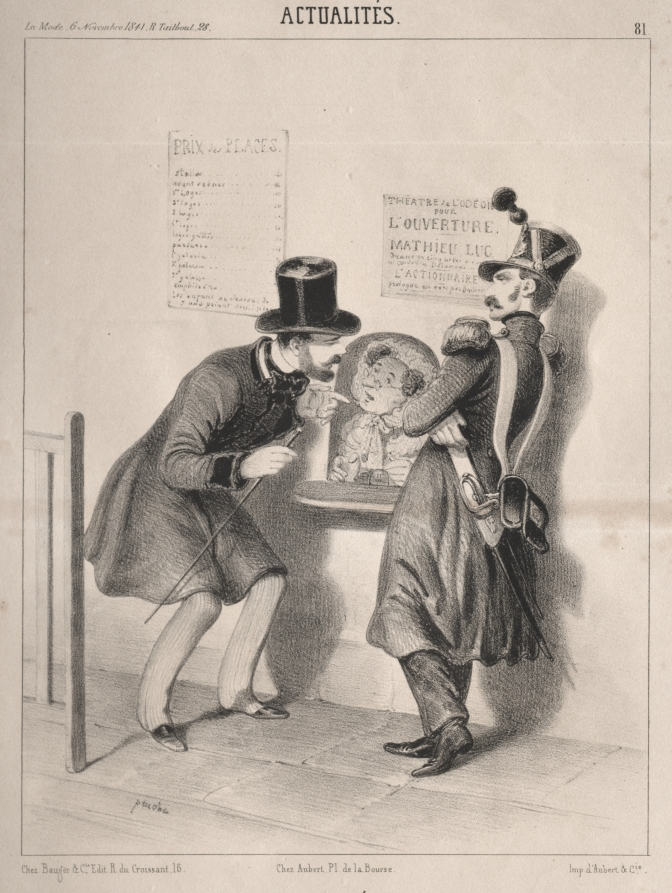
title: Actualités: L'Ouverture du second théatre français. Mr. tout est plein vous ne trouveriez pas même un place au paradis! si vous voulez revenir dans un quinzaine, peut-être que nous en aurons!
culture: France, 19th century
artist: Clémente Pruche (French, 1831–1870)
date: c. 1839–41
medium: lithograph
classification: Print